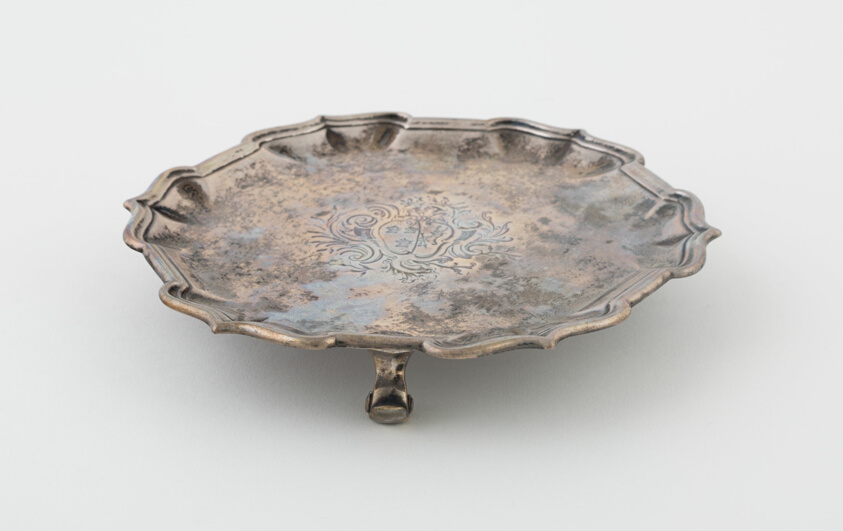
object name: Metalwork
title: Waiter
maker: Edward Feline; English, active 1720-53; London, England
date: 1738/39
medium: Silver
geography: London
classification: silver; metalwork; european decorative arts